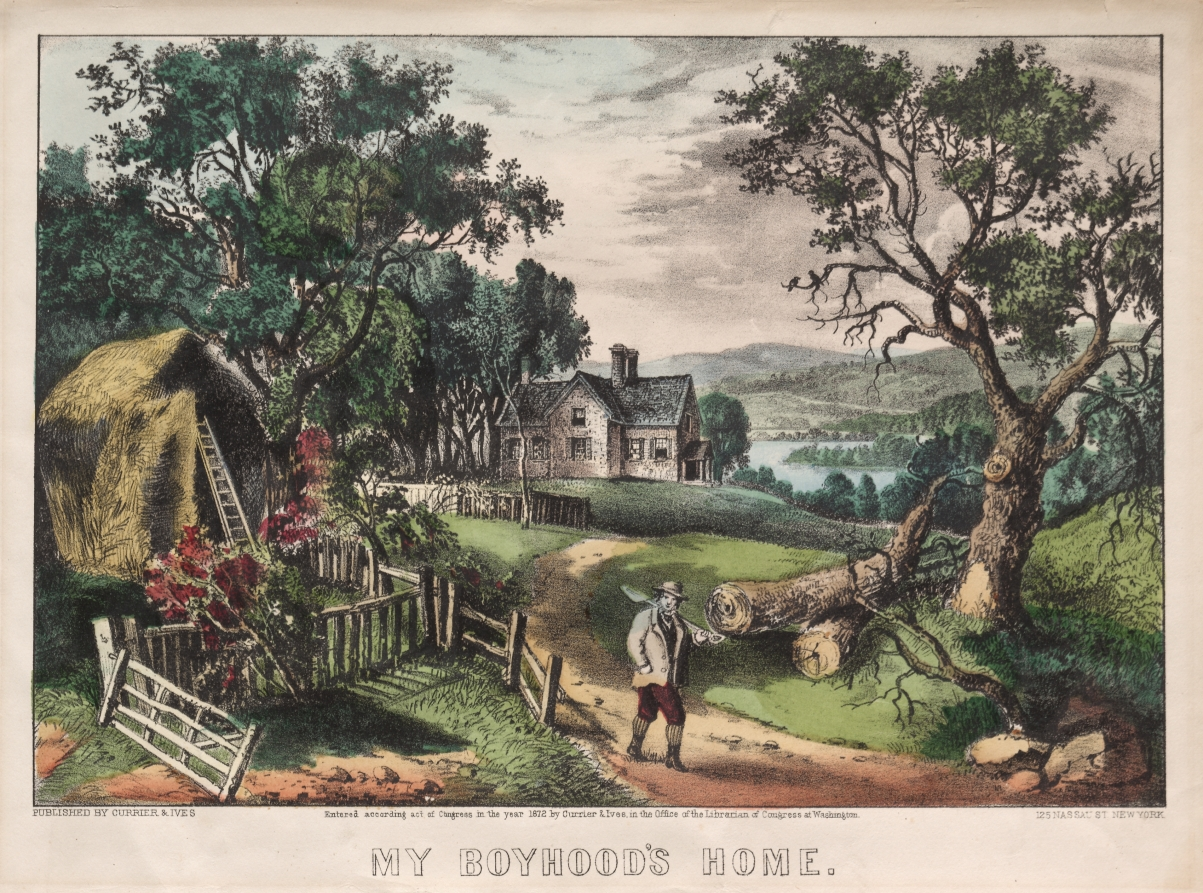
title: My Boyhood's Home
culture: America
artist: and James Merritt Ives (American, 1824–1895)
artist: Nathaniel Currier (American, 1813–1888)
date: 1872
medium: lithograph, hand colored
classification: Print